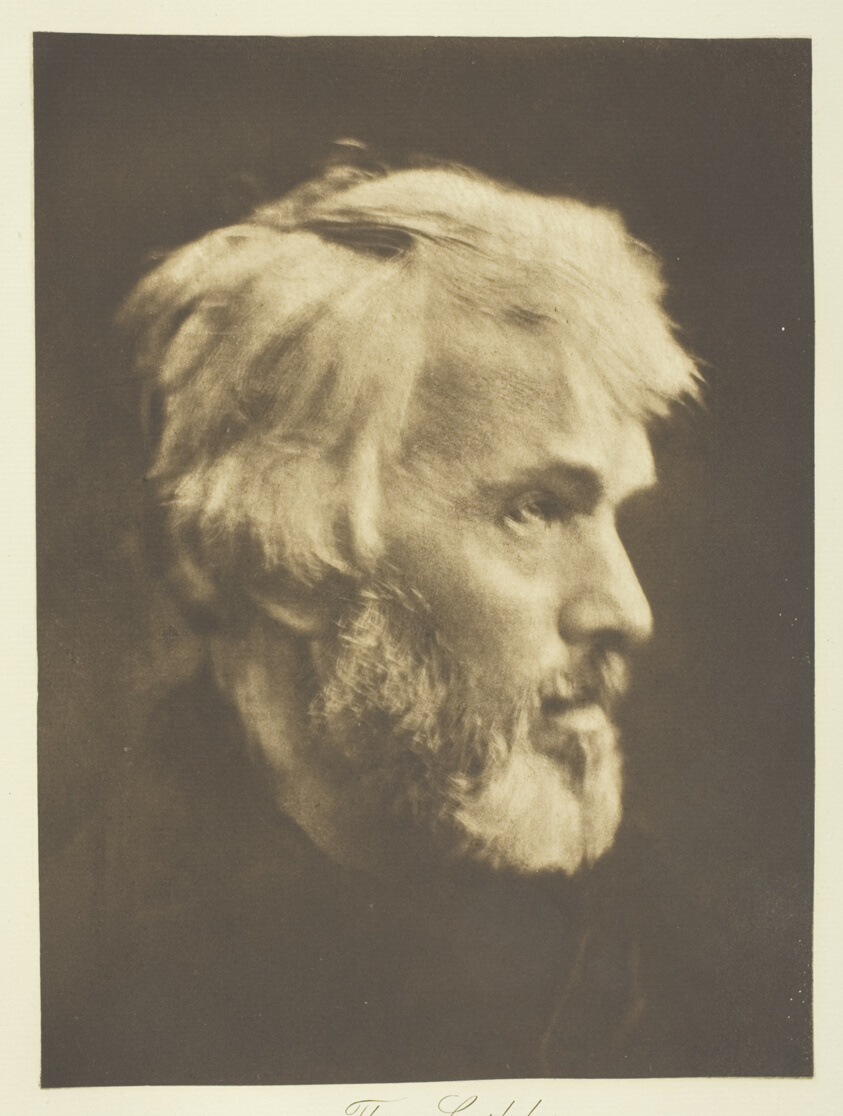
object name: Photograph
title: Thomas Carlyle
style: 19th century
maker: Julia Margaret Cameron (English, 1815–1879)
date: 1867, printed c. 1893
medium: Photogravure, plate 8 from the album "Lord Tennyson and his Friends" (1893)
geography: England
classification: photogravure; photomechanical process; photography; photograph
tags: Collected by Hugh Edwards, Lord Tennyson and His Friends